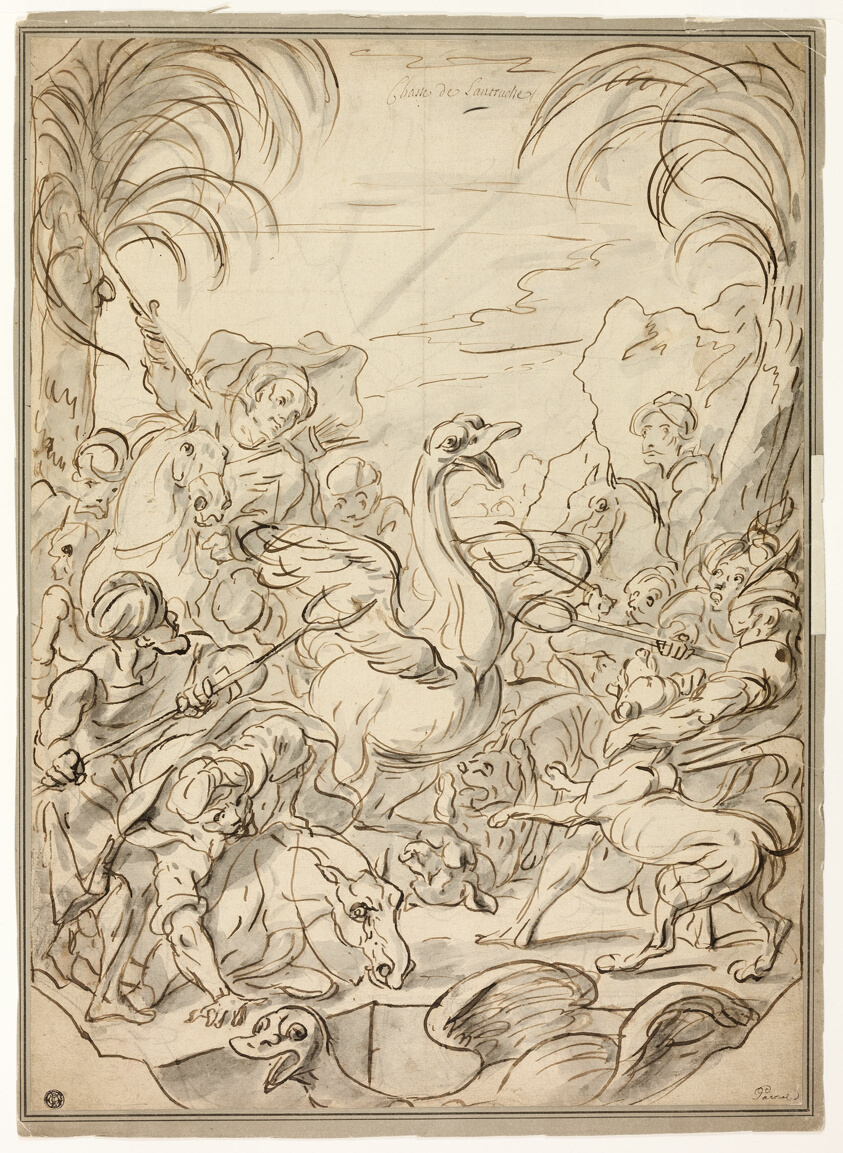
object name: Drawing and Watercolor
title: Ostrich Hunt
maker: Charles Parrocel (French, 1688-1752); or Charle van Loo (French, 1705-1765); or Joseph Francois Parrocel (French, 1704-1781)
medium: Brush and brown ink, with gray and brown wash, over graphite on cream laid paper, laid down on cream board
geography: France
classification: ink or chalk wash; drawings (visual works); prints and drawing